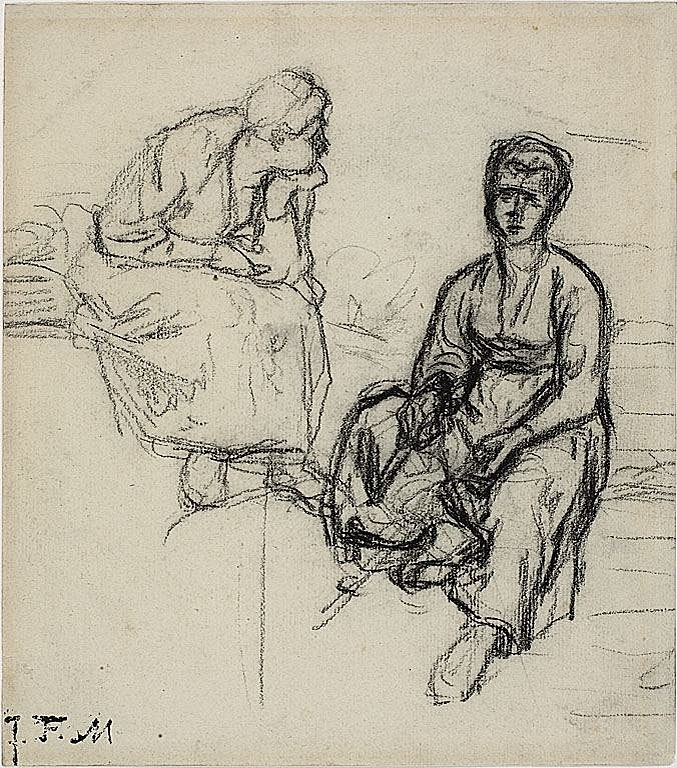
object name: Drawing and Watercolor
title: Two Studies of a Seated Peasant Woman (recto); Study of a Young Girl Wearing a Hat (verso)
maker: Jean François Millet (French, 1814-1875)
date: c. 1869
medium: Charcoal (recto), and black chalk (verso), on ivory laid paper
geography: France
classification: charcoal; drawings (visual works); prints and drawing